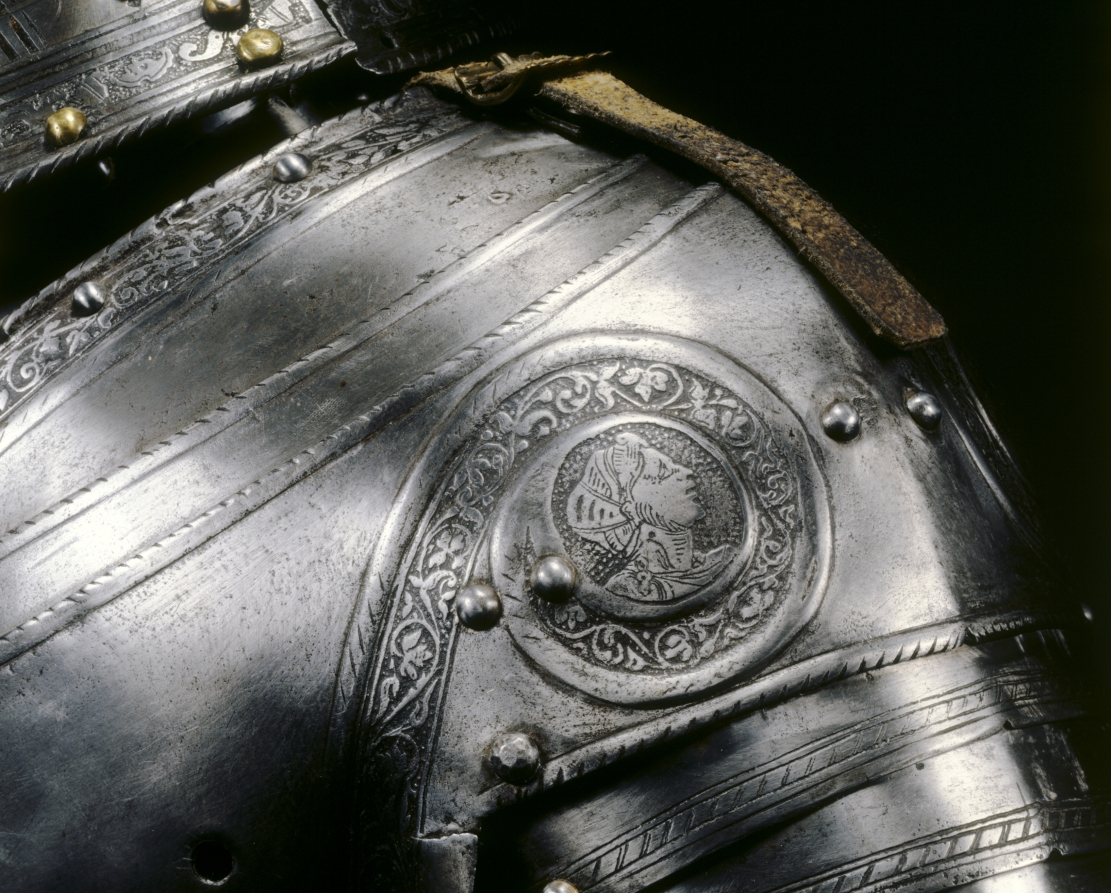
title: Half-Suit of Armor for the Field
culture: North Italy, Brescia (?), 16th century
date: c. 1575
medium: steel with etched decorative bands and roundels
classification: Arms and Armor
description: Decoration was critical to fine armor, and etching was the most commonly used technique. Here, the bands along the borders are etched. On the breastplate, pauldrons (shoulder guards), and tassets (hip and upper leg guards), etched medallions enclose profile busts reminiscent of ancient Roman portraits. The lance rest on the breastplate indicates that this half-suit was once part of a complete field armor for man and horse. The etching technique used for armor was developed in the late 1400s. The metal surface was first coated with an acid-resistant substance, such as wax or varnish. An etching needle was then used to scratch a design into the surface. The exposed areas were then treated with an acid that would "bite" or etch the lines into the metal. When the coating was removed, the etched design was blackened for contrast.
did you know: This is an example of raised field etching where the design stands out in slight relief from the background.